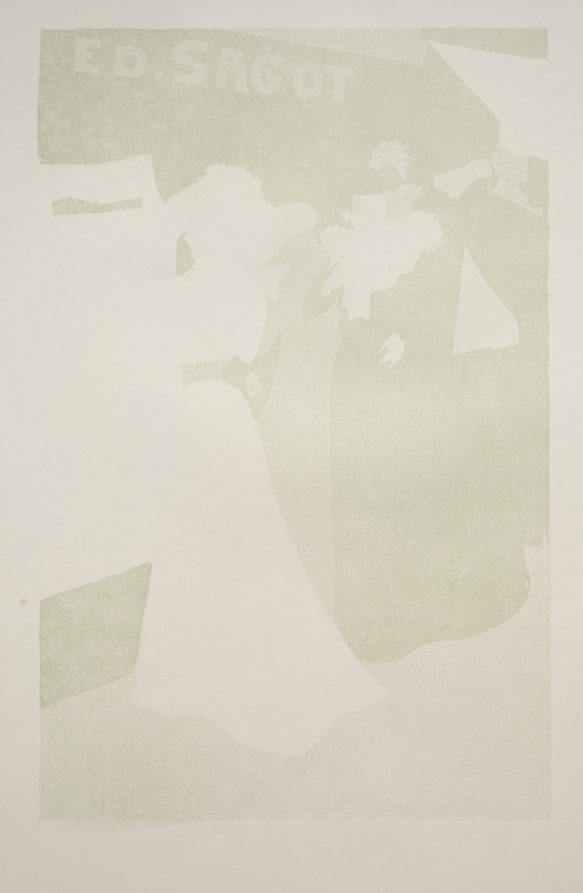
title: Sagot's Gallery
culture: France, 19th century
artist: Georges Alfred Bottini (French, 1874–1907)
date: 1898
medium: color separation proof in green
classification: Print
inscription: lower right, in graphite: 27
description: The last decades of the 19th century were the golden era of French color lithography. Jules Cheret (1836-1932) popularized the technique to make colorful posters which, by 1884, were also exhibited as a legitimate art form. In 1891 Cheret began to design posters without lettering to frame and hang on walls---still an unusual idea since prints were usually stored in portfolios. The explosion in color lithography was also encouraged by the use of zinc plates, which were lighter, cheaper, and more pliable than traditional lithographic stones. Also important was the formation of artist's organizations like the Société des artistes lithographie (Society of Lithographic Artists) and the Société de l'estampe originale (Society of Original Prints), which stimulated original printmaking. By the 1890s a proliferation of fine printers, independent exhibitions, publications devoted to prints, critics, publishers, and dealers like Sagot, all supported color lithography.